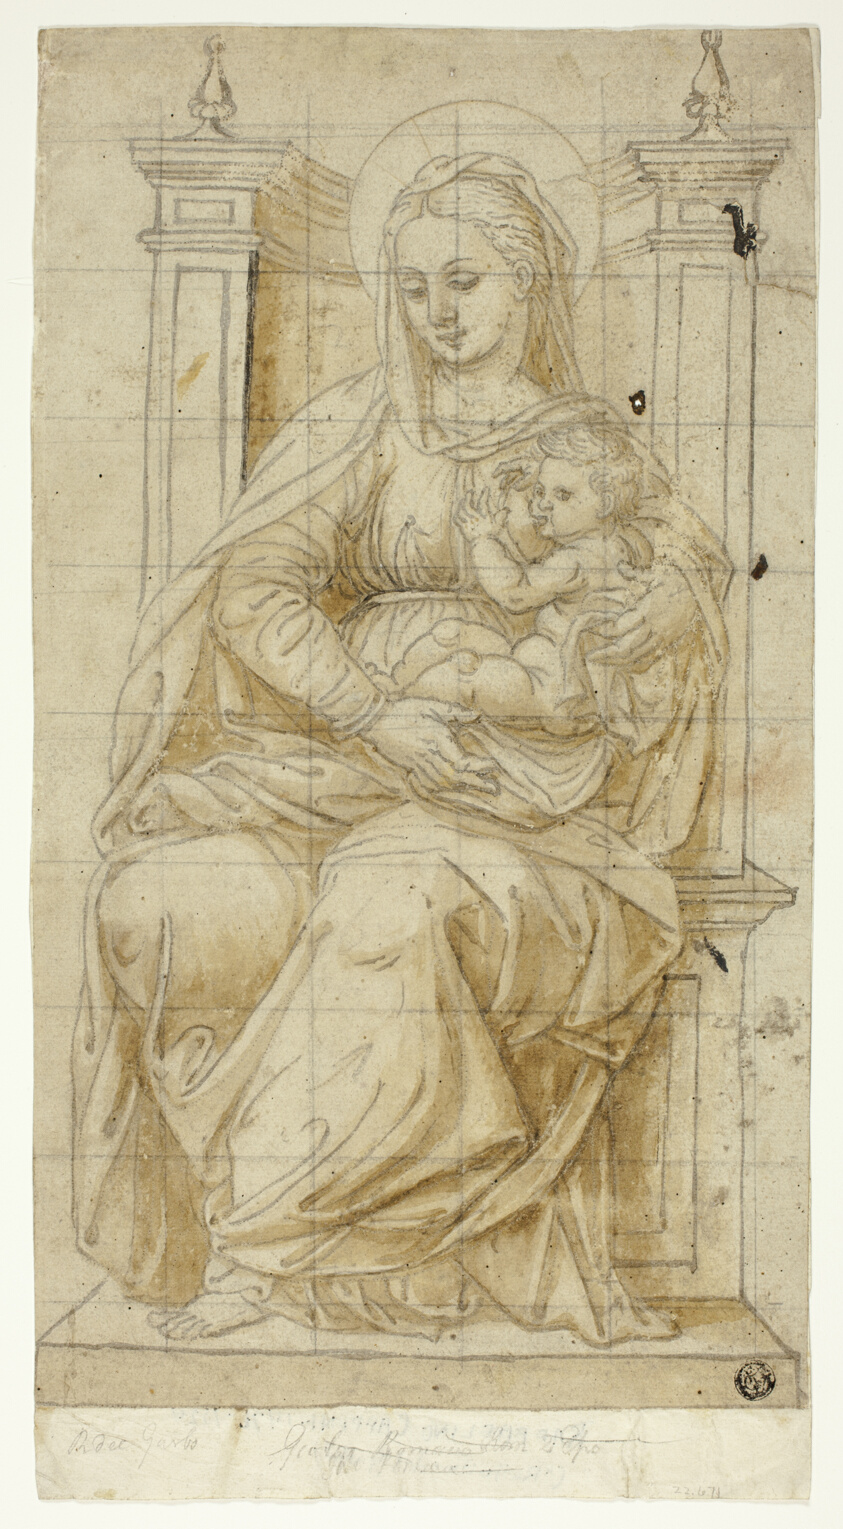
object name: Drawing and Watercolor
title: Virgin Nursing the Christ Child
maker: Unknown Artist; Italian, early 16th century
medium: Brush and brown and gray wash over traces of black chalk, on cream laid paper, pricked for transfer, squared in graphite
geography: Central Italy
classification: chalk and wash; drawings (visual works); prints and drawing